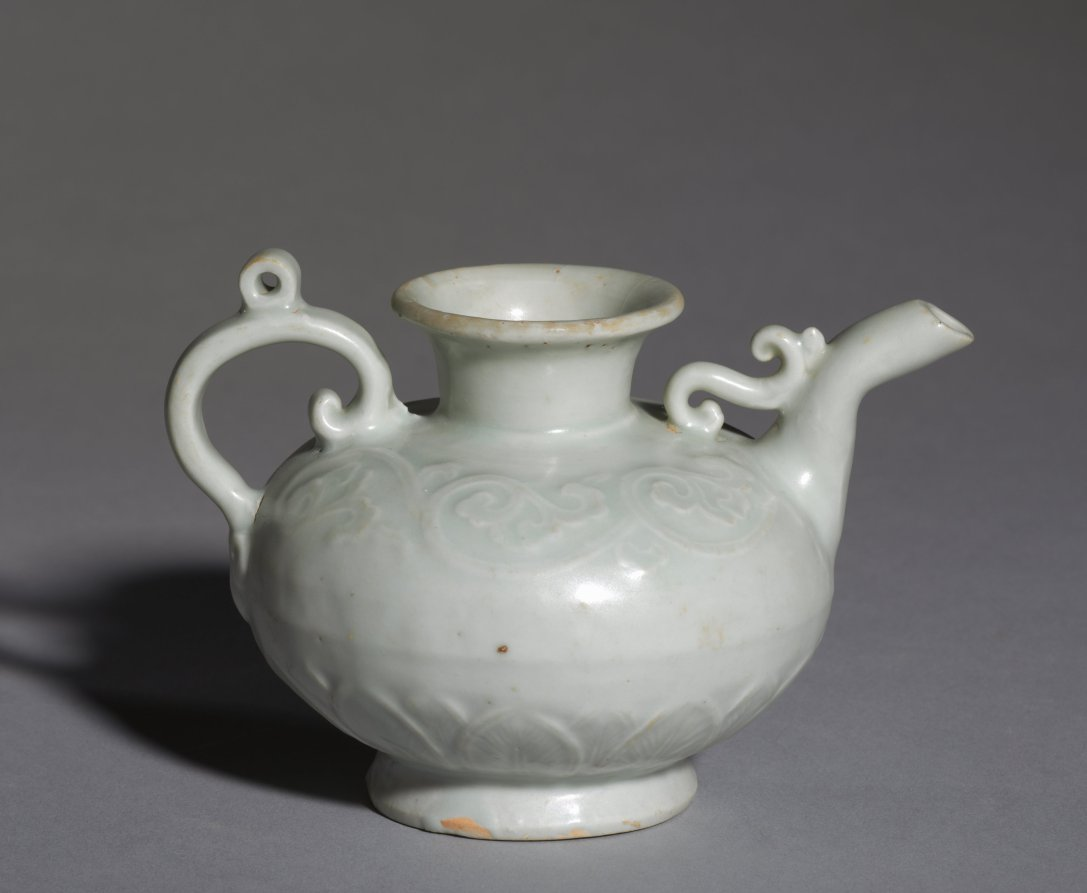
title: Ewer with Floral Scrolls and Plantain Leaves in Relief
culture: China, Jiangxi Province, Yuan dynasty (1271–1368)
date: early 1300s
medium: glazed porcelain with molded decoration, Shufu ware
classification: Ceramic